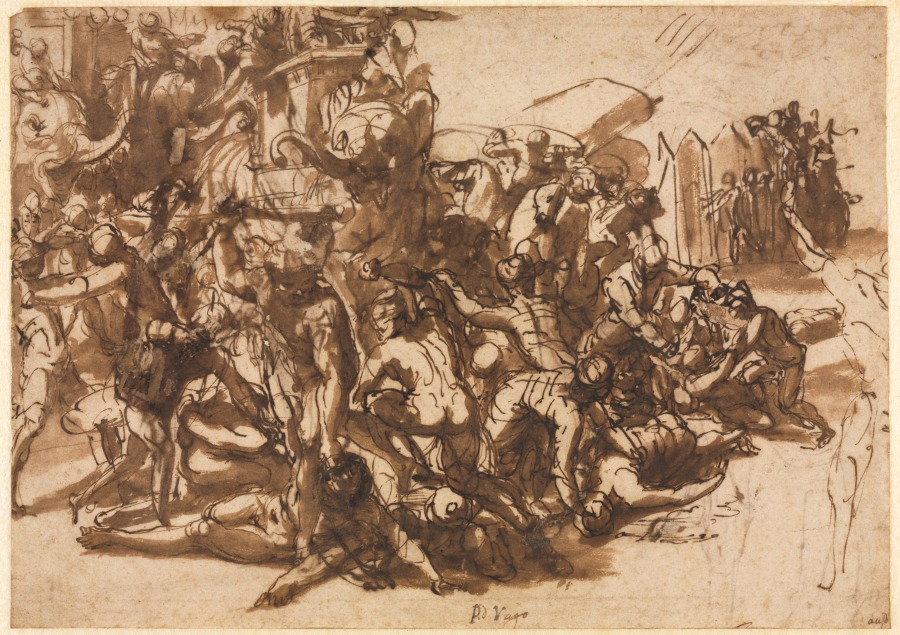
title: Poros Assailed by the Macedonian Army (recto); Sketches of Animals (verso)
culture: Italy, 16th century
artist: Perino del Vaga (Italian, 1501–1547)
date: c. 1545/47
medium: pen and brown ink (iron gall) and brush and brown wash; framing lines in gold paint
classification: Drawing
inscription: recto: lower center, in brown ink: P.d Vago ; lower right, in brown ink: aud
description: Perino del Vaga made this spirited pen and ink and wash drawing as a preliminary sketch for a fresco cycle depicting the military campaigns of Alexander the Great, intended for the apartments of Pope Paul III in the Castel Sant’Angelo in Rome. At the time, he was also working on commissions at the Vatican Palace where he studied and drew from the frescoes of Michelangelo in the Sistine Chapel. One pose in the drawing, that of the man in front who, sword poised over his head, prepares to strike a man below, was probably inspired by Michelangelo’s rendering of David and Goliath on the ceiling. Perino adapted the violent pose for a military rather than biblical subject, filling out the scene with trumpeting elephants and a pile of soldiers in combat. On the verso of the sheet, Perino drew a quick sketch of a standing camel and another, closer view of the animal's head and legs.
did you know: This artist was in Rome in 1527 when the troops of Charles V sacked the city, and was imprisoned and forced to pay a heavy ransom for his, his wife's, and his daughter's safe release.